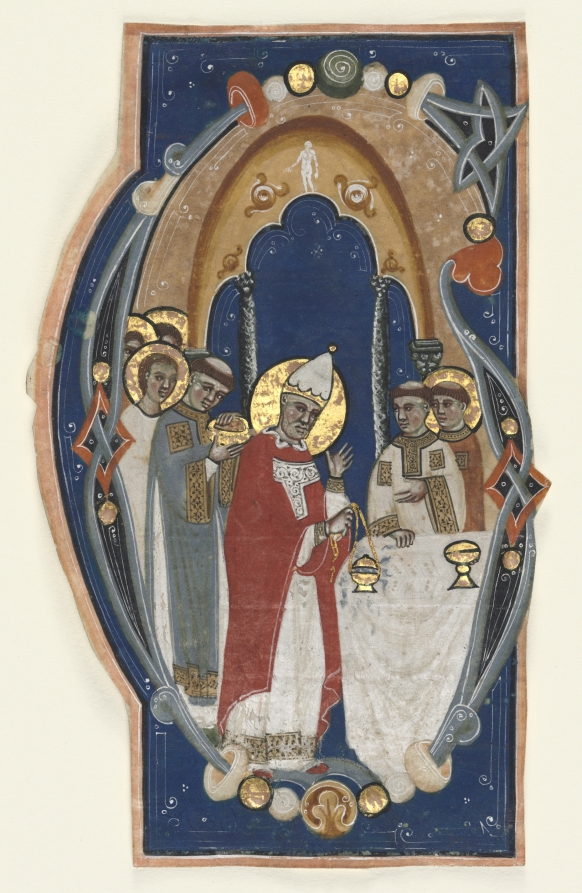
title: Historiated Initial (G) Excised from a Choir Book: St. Gregory the Great Celebrating Mass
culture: Italy, Bologna(?)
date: c. 1300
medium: tempera on parchment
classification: Manuscript